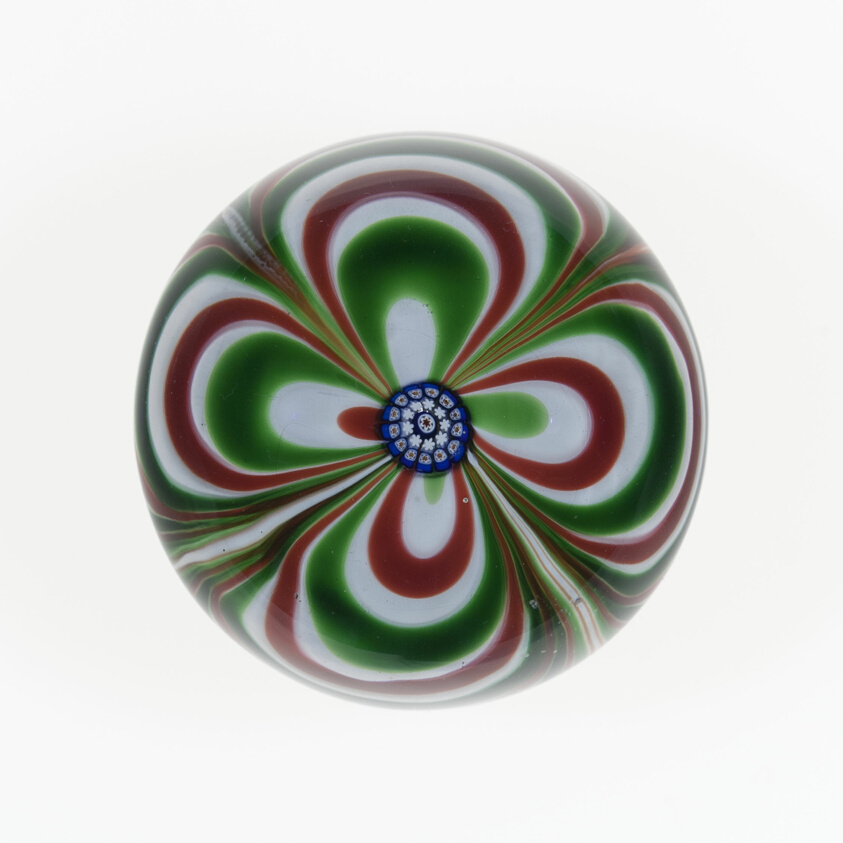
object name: Glass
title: Paperweight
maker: Saint-Louis Glassworks (Cristalleries de Saint-Louis); Lorraine, France, founded 1586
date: c. 1846–55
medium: Glass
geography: Saint-Louis-lès-Bitche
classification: paperweight; lampwork; european decorative arts; glass